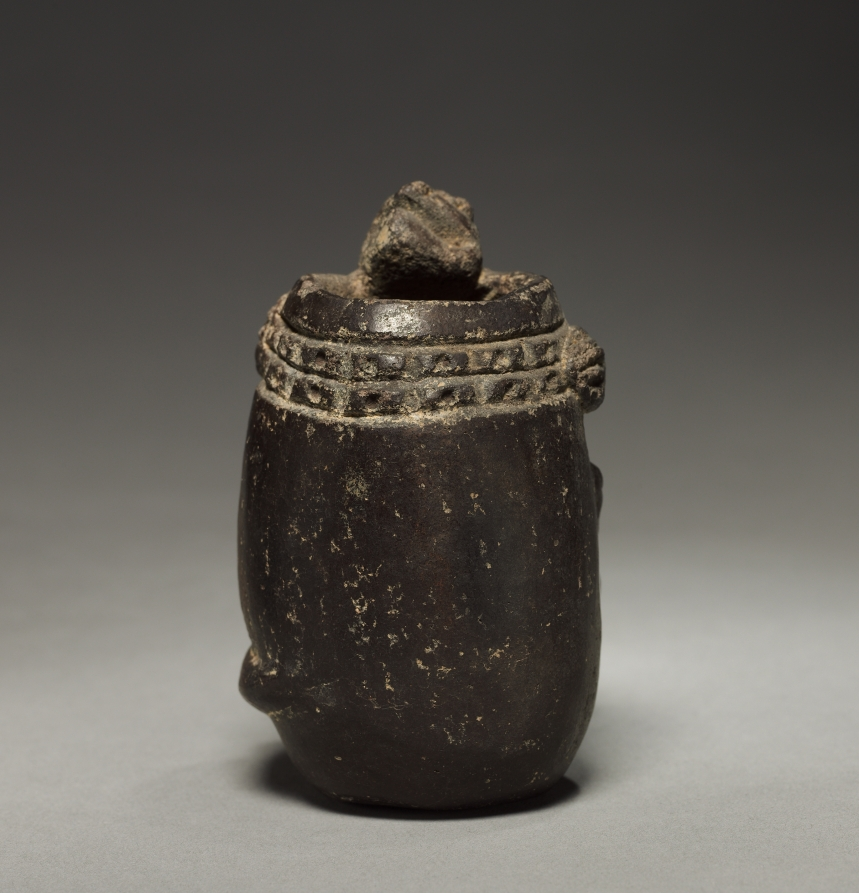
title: Jar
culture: Colombia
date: before 1921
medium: pottery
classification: Ceramic